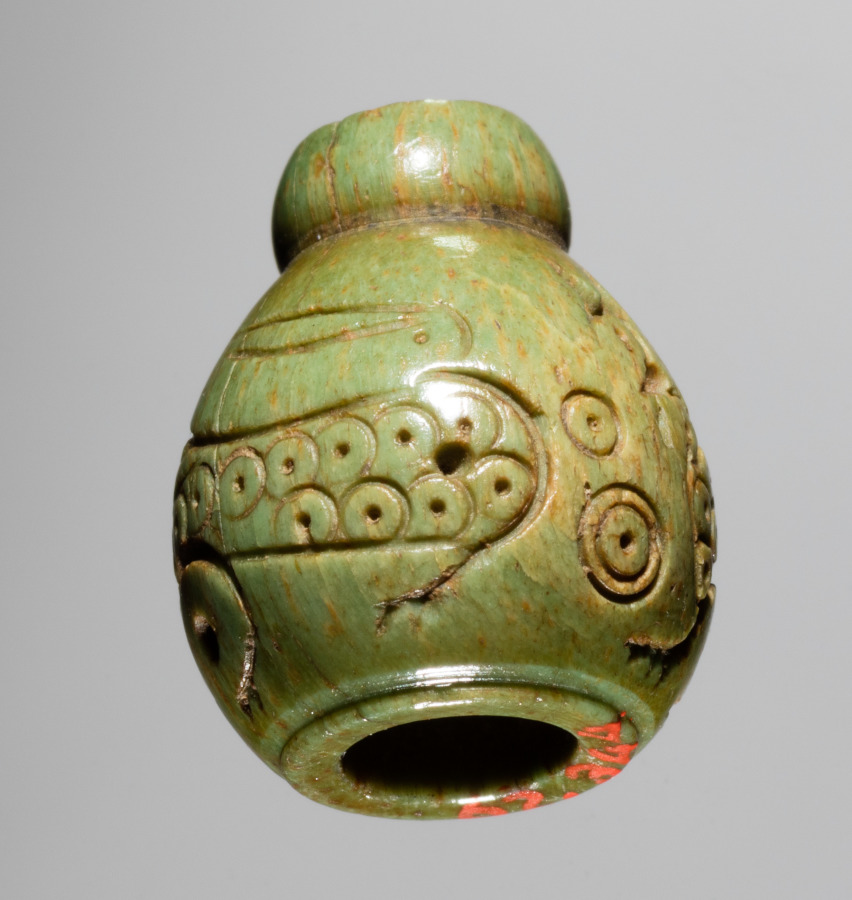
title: Spindle Whorl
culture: Iran, early Islamic period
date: 700s - 900s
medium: bone, incised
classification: Spindle Whorl